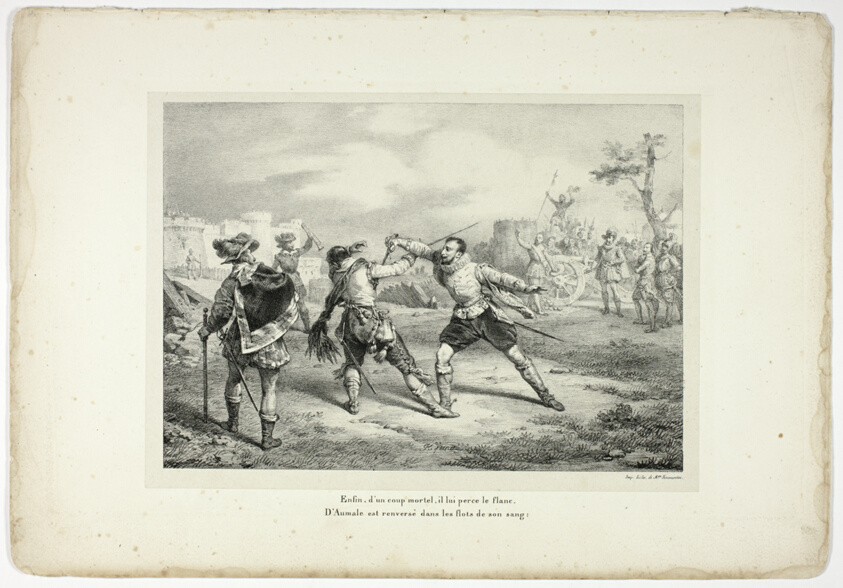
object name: Print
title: Enfin, d'un coup mortel, il lui perce le flanc...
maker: Horace Vernet (French, 1789-1863); poem by Voltaire (French, 1694-1778); printed by Mademoiselle Formentin (French, 18th-19th century); published by Dubois (French, 18th-19th century)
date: 1825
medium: Lithograph in black on gray chine, laid down on ivory wove paper (chine collé)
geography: France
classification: lithograph; print; prints and drawing